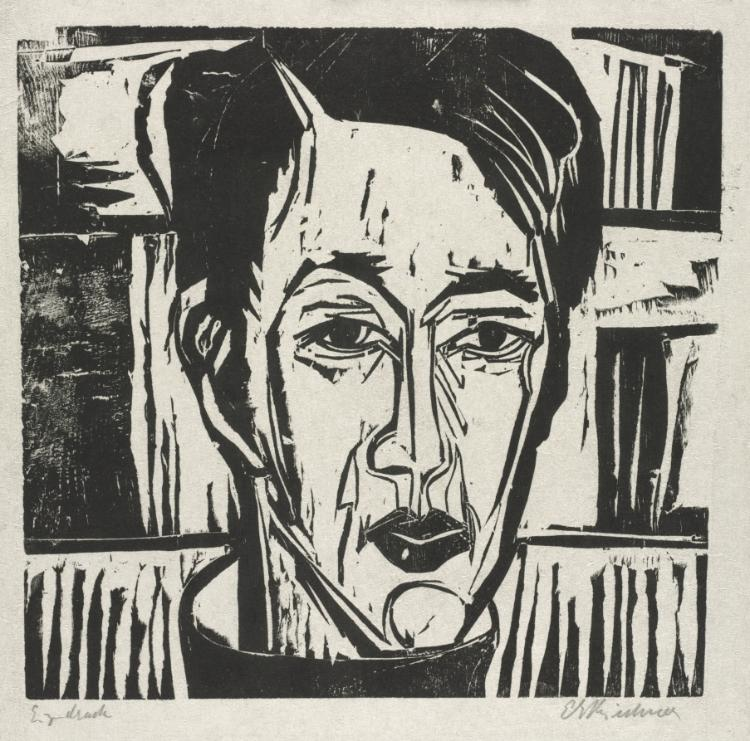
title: Wehrlin, Facing front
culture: Germany, 20th century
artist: Ernst Ludwig Kirchner (German, 1880–1938)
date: 1924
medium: woodcut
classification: Print